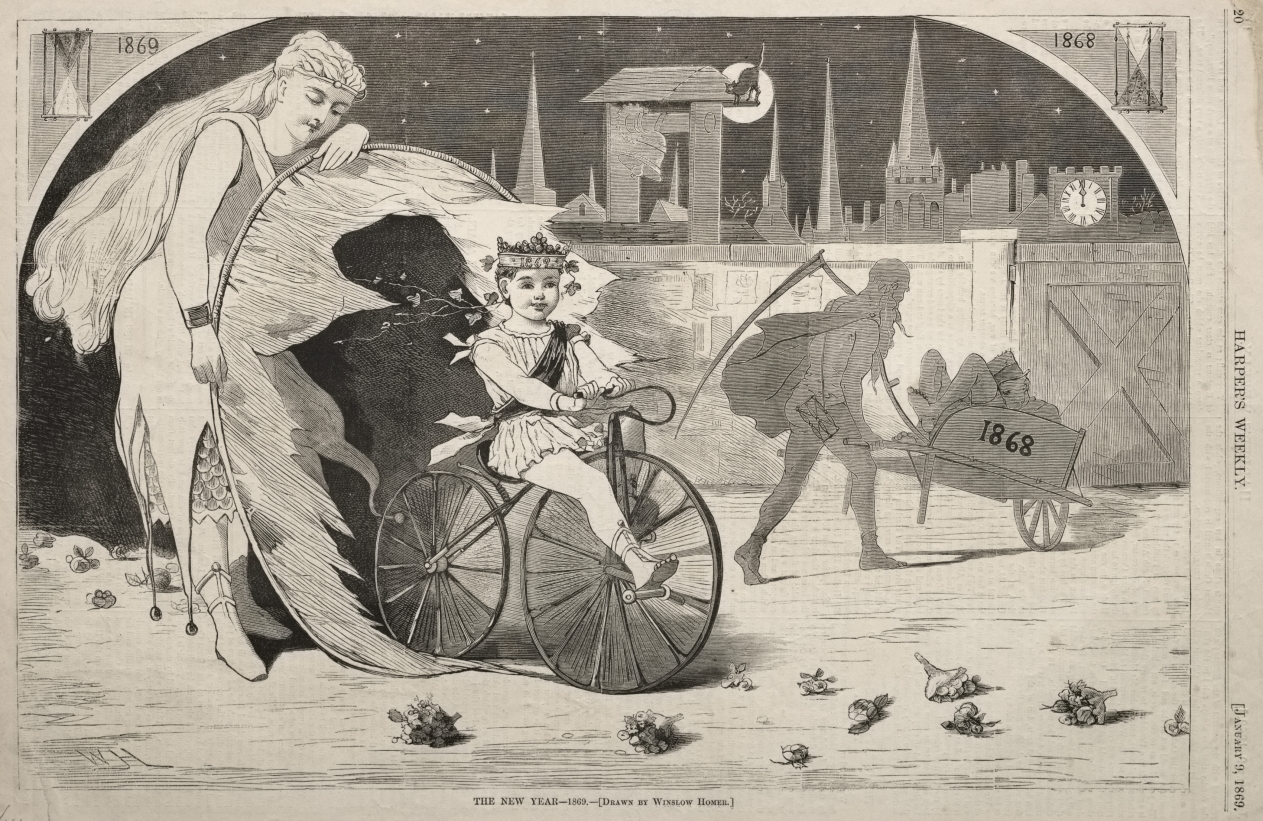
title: The New Year - 1869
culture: America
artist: Winslow Homer (American, 1836–1910)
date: 1868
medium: wood engraving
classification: Print